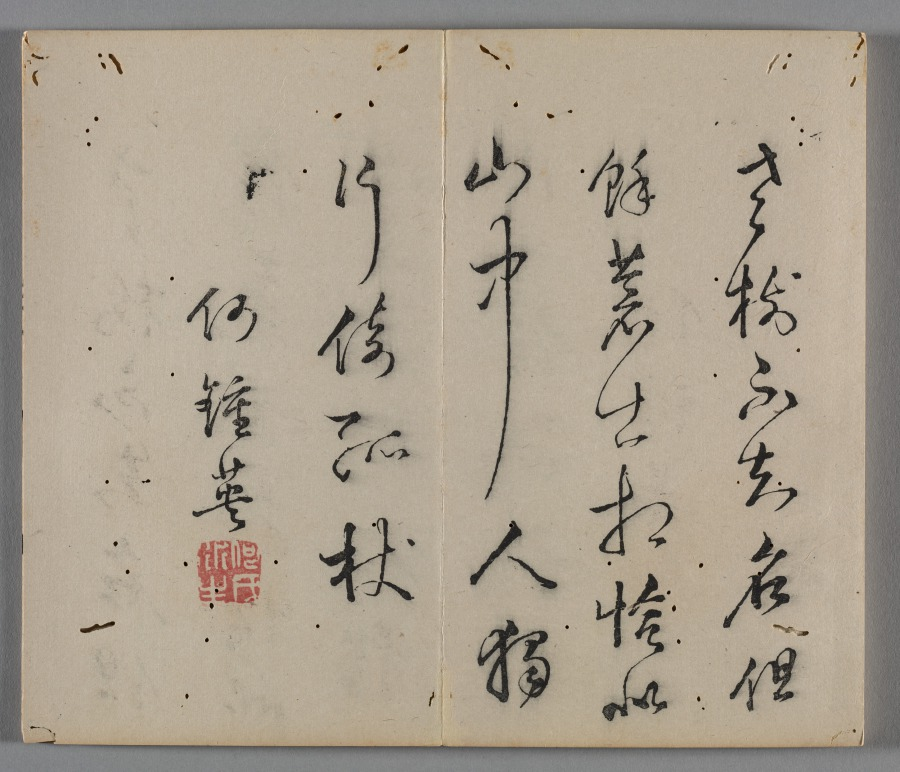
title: Ten Bamboo Studio Painting and Calligraphy Handbook (Shizhuzhai shuhua pu): Birds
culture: China, Qing dynasty (1644-1911)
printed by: Hu Zhengyan (Chinese, c. 1584–1674)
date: 1633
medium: Woodblock-printed book; ink and colors on paper; first edition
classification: Print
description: Color printing reached a level of perfection in the early 1600s, as seen in this Ten Bamboo Studio Collection of Calligraphy and Painting and the Mustard Seed Garden Manual of Painting (printed 1679 and 1701). The painterly quality, precision in registering (aligning) the woodblocks, and harmonious colors made them the most successful color print editions in Chinese history. Both editions were printed and compiled in Nanjing, spread nationwide, and had a great impact on the arts in Japan and Korea.